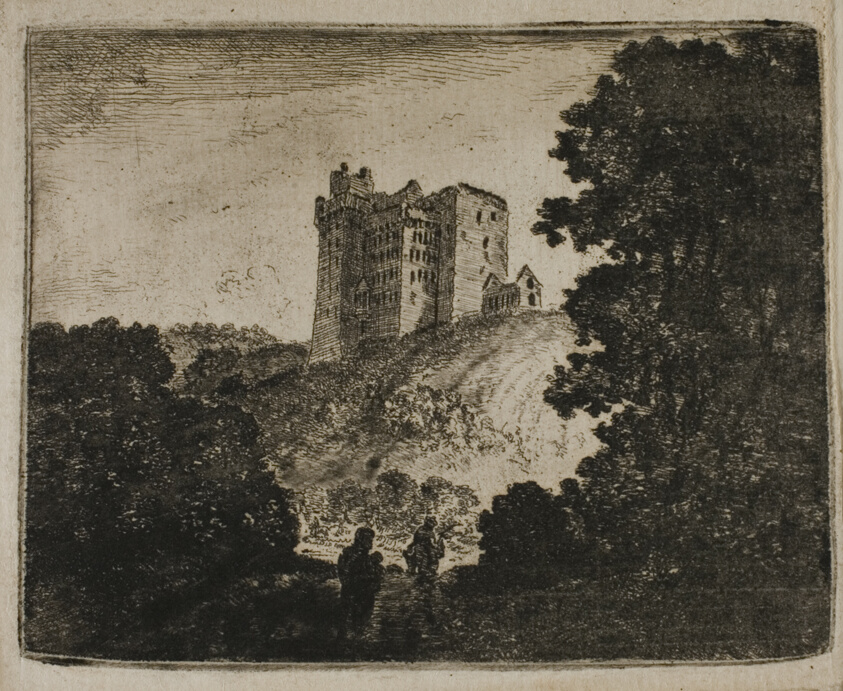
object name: Print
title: Crichton Castle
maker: John Clerk of Eldin (Scottish, 1728-1812)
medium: Etching on paper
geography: Scotland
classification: etching; print; prints and drawing